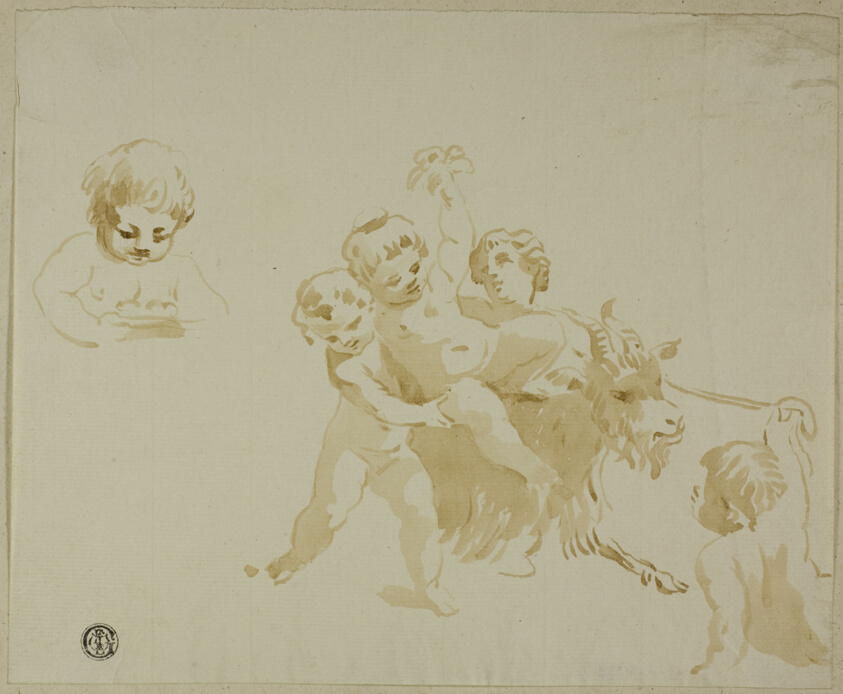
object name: Drawing and Watercolor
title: Putti Playing with Goat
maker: Count Antonio Maria Zanetti, the Elder; Italian, 1680–1757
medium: Brush and brown wash, on ivory laid paper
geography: Italy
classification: ink or chalk wash; drawings (visual works); prints and drawing